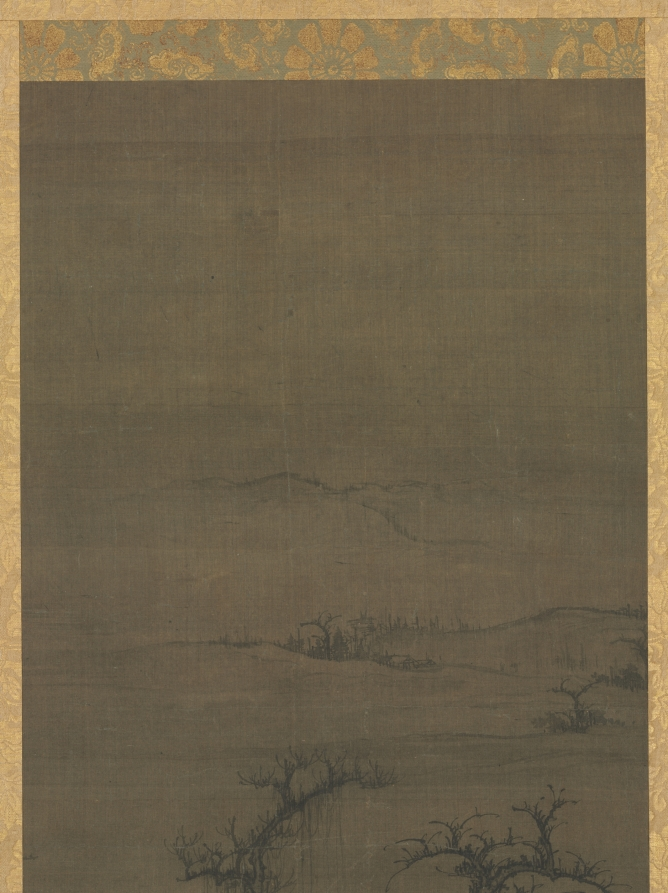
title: Carrying a Qin on a Visit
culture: China, Yuan dynasty (1271-1368)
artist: attributed to Luo Zhichuan (Chinese, active 1280s–1320s)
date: 1271–1368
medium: hanging scroll (now paneled), ink on silk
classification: Painting